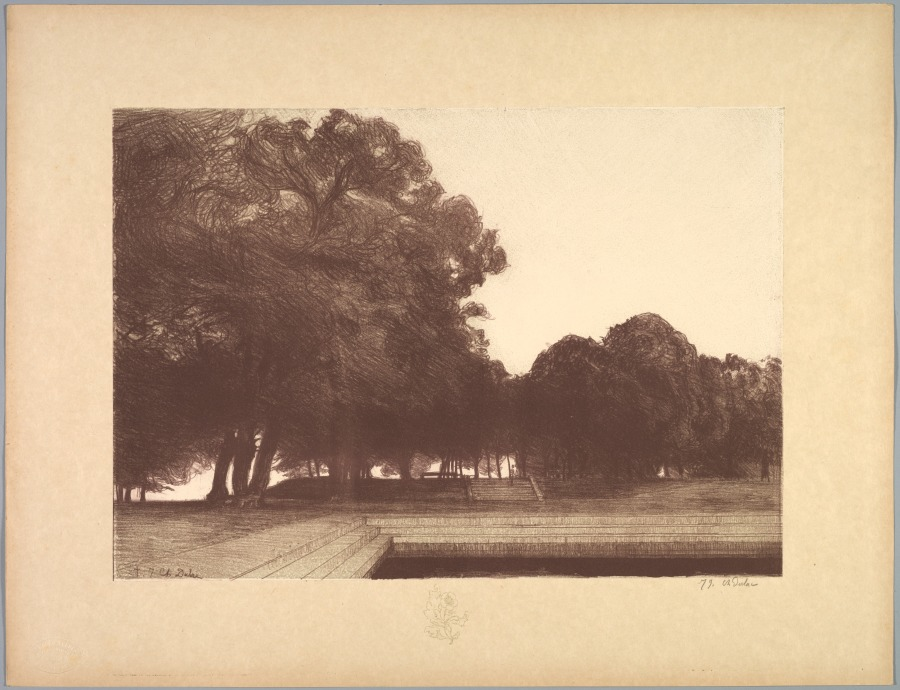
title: Suite de Paysages: Landscape, Plate 7, Remarque, Poppies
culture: France, 19th century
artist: Charles Marie Dulac (French, 1865–1898)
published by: Printed by Monrocq Frères, Paris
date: 1892–1893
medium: color lithograph on chine collé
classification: Print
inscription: Below image, right, in graphite: 79. Ch Dulac In plate, lower left corner: t.7 Ch Dulac Bottom left corner, blindstamp: MONROCQ FRÈRES / ÉDITEURS IMPRIMEURS / PARIS / RUE SUGER, 3 encircled